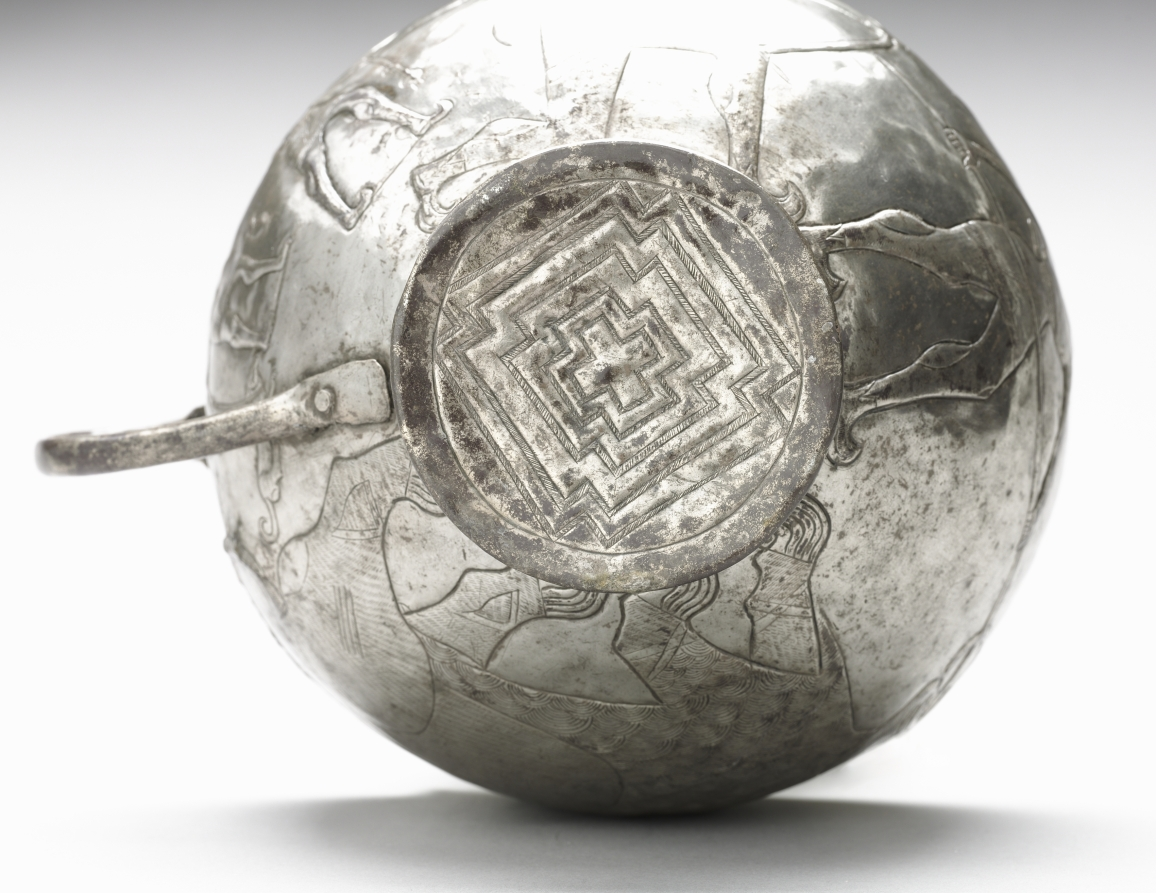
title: Lion Hunting Cup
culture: Iran, Amlash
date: 1100–1000 BCE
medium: silver, raised, chased, repoussé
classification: Metalwork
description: The nomadic gold- and silversmiths of Marlik and Amlash were the first masters of precious metalwork in Iran. Their successors were the bronze workers of Luristan and the silversmiths of the Achaemenian and Sasanian empires.